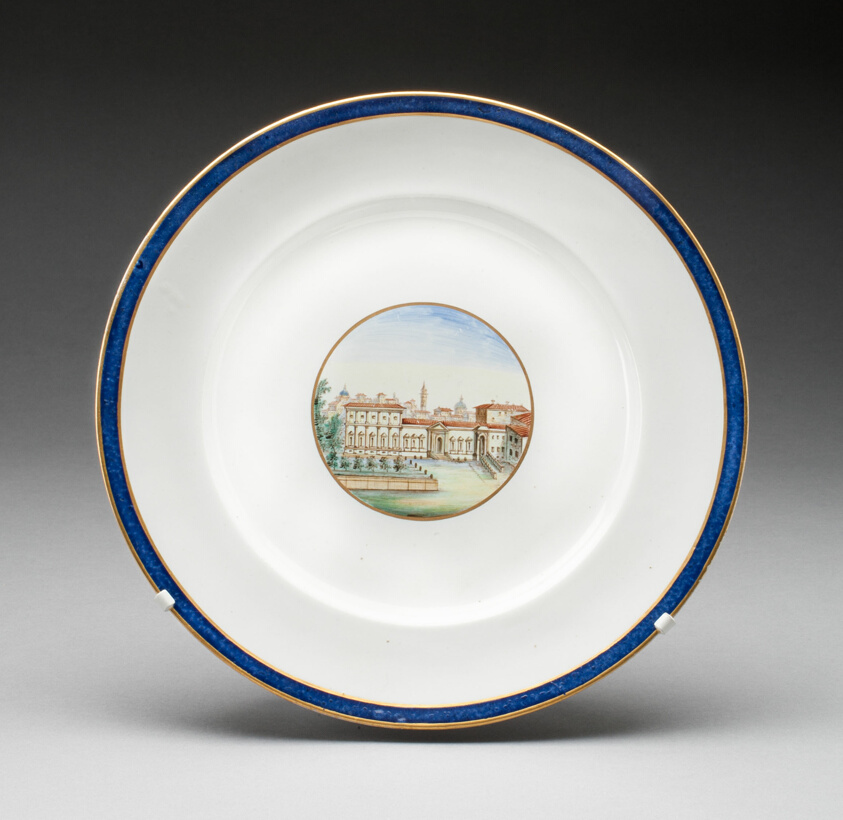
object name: Ceramics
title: Plate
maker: Italy, Naples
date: Early 19th century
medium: Porcelain with polychrome enamels and gilding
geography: Naples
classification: plate (general, dish); tableware; dish (vessel); ceramics; porcelain; european decorative arts